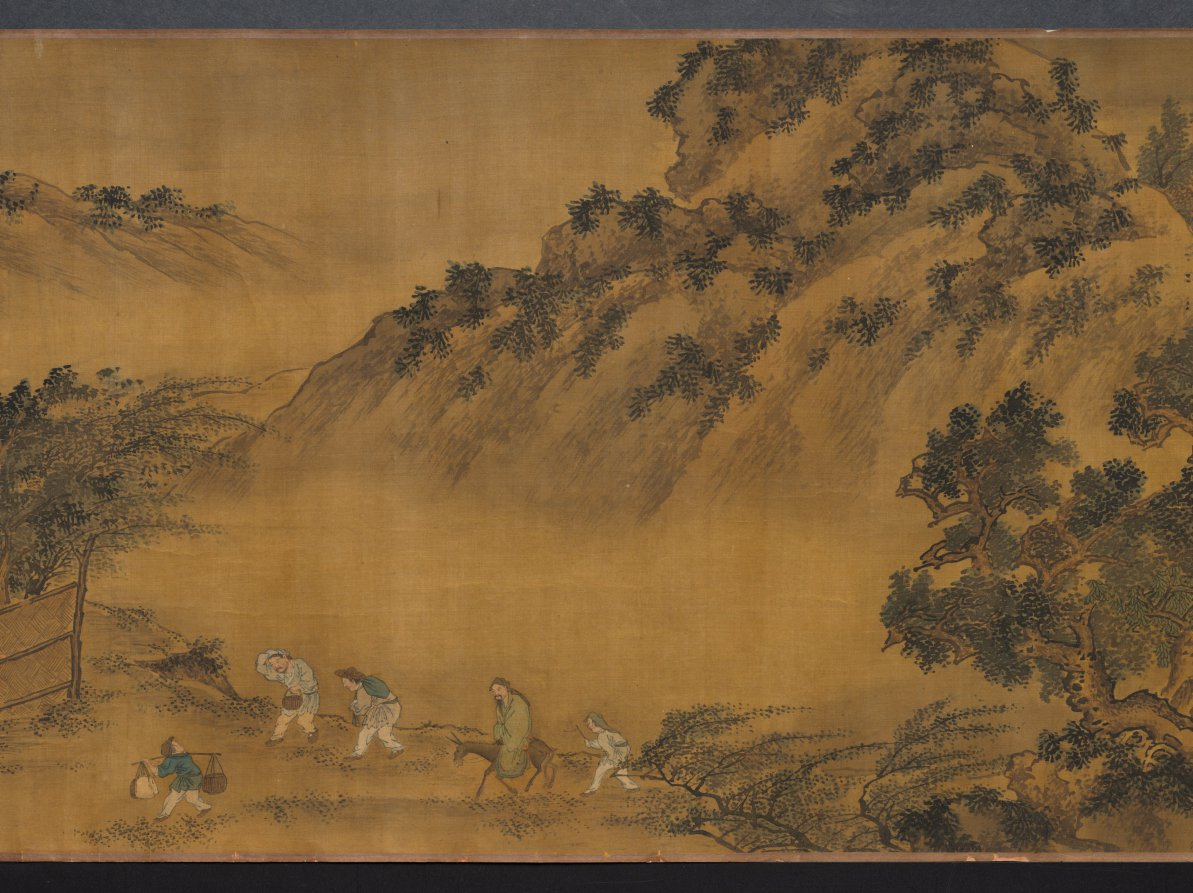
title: Returning to the Village in a Rainstorm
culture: China, Ming dynasty (1368–1644)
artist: Xie Shichen (Chinese, 1487–after 1567)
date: 1530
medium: Handscroll; ink and light color on silk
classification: Painting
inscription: 風雨歸村圖 嘉靖庚寅秋日樗仙謝時臣. [印] 謝時臣印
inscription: 3 additional seals unidentified.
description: This scroll depicts a wind- and rainswept landscape with figures in the countryside struggling against a late summer monsoon rainstorm. Such weather was familiar to residents of the lower Yangzi delta. Xie Shichen spent most of his life in the Suzhou area. Details of his career are scant, but his surviving works suggest that he made his living as a professional painter. This painting conveys drama and anecdotal observations, characteristic of Zhe school paintings, such as the one by Lü Wenying, CMA 1970.76.